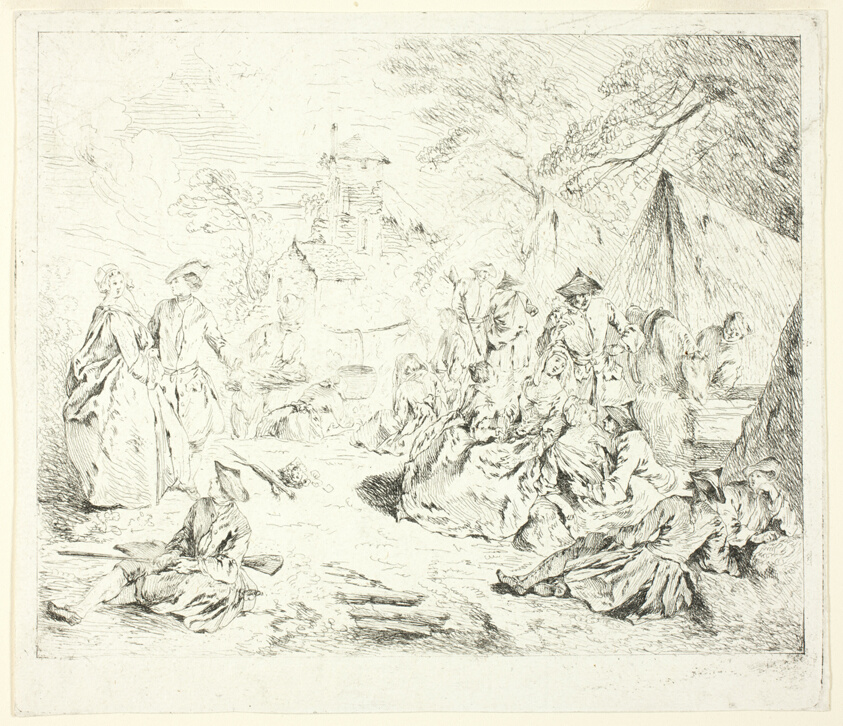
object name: Print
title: Halte de Soldates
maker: Jean-Baptiste Pater (French, 1695-1736)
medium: Etching in black on paper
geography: France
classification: etching; print; prints and drawing